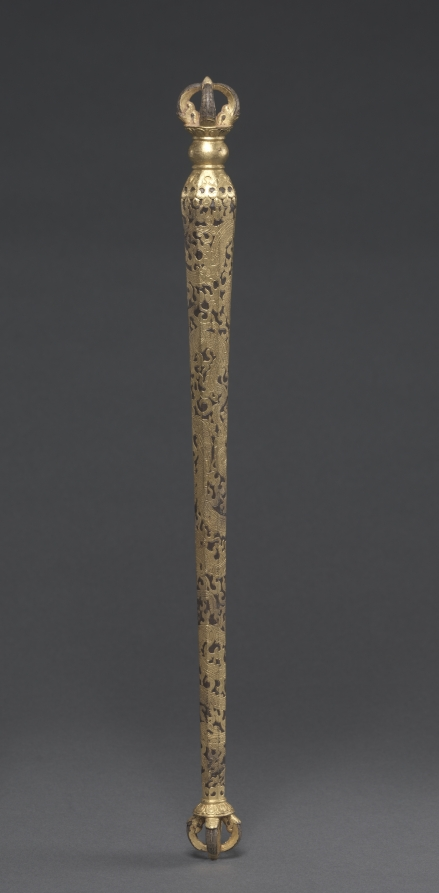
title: Ritual Mace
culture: Sino-Tibetan, Derge School, Yongle period (1403-1427)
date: early 1400s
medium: iron alloy with gold inlay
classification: Metalwork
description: Ceremonial weaponry was used in tantric rituals to combat obstacles to enlightenment, such as ignorance and uncontrolled passions. In 1407 a high-ranking Tibetan monastic patriarch visited the emperor of the Ming dynasty, known as Yongle. The Yongle emperor presented him with a number of gifts, of which the axe, mace, flaying knife, incense burner (1983.154), and the gilt bronze Virupa (1972.96) appear to have been a part, since the sculpture and the axe bear his identifying inscription in a cartouche. Imperial Chinese workmanship is noted in the lush rendering of the lion heads from which the blades emerge, the calligraphic serpentine forms, and the cloud motifs.